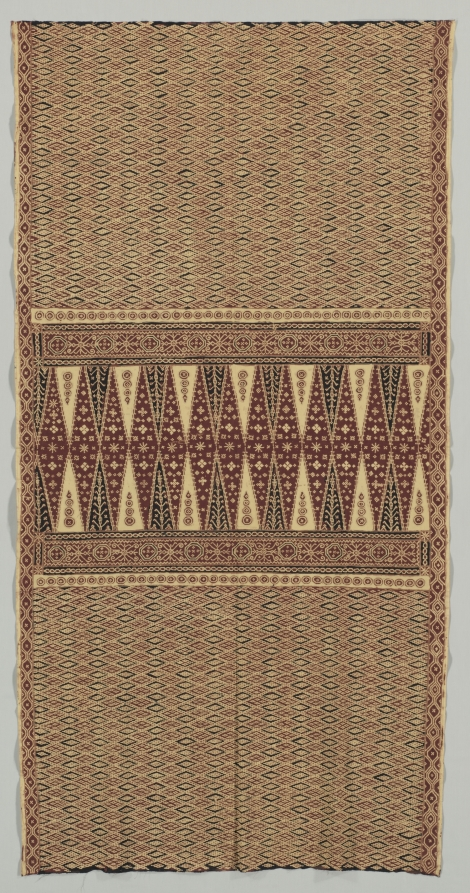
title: Sarong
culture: Indonesia, Java, early 20th century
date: early 1900s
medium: plain weave cotton with resist diamond motif in black and red on yellow ground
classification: Textile